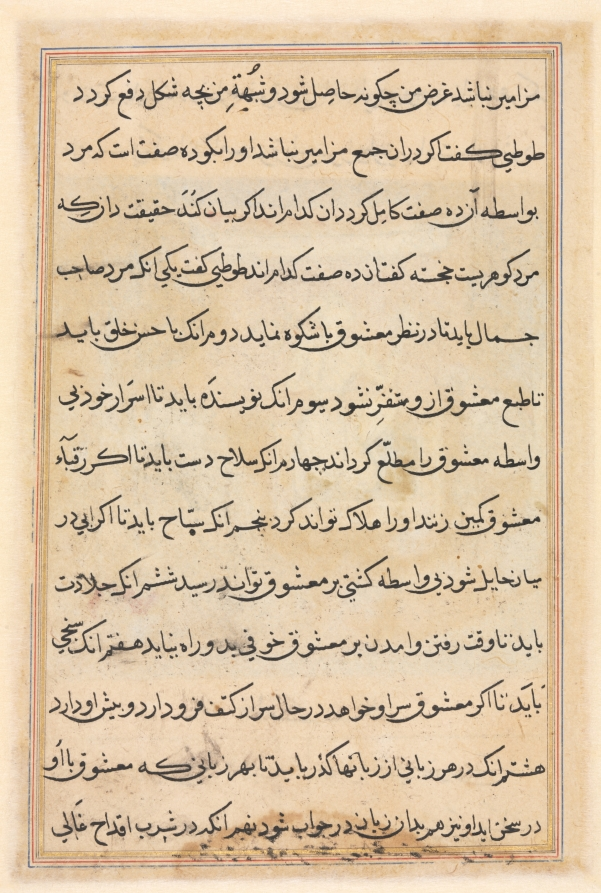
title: Page from Tales of a Parrot (Tuti-nama): text page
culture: Mughal India, court of Akbar (reigned 1556–1605)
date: c. 1560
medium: gum tempera, ink, and gold on paper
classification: Painting